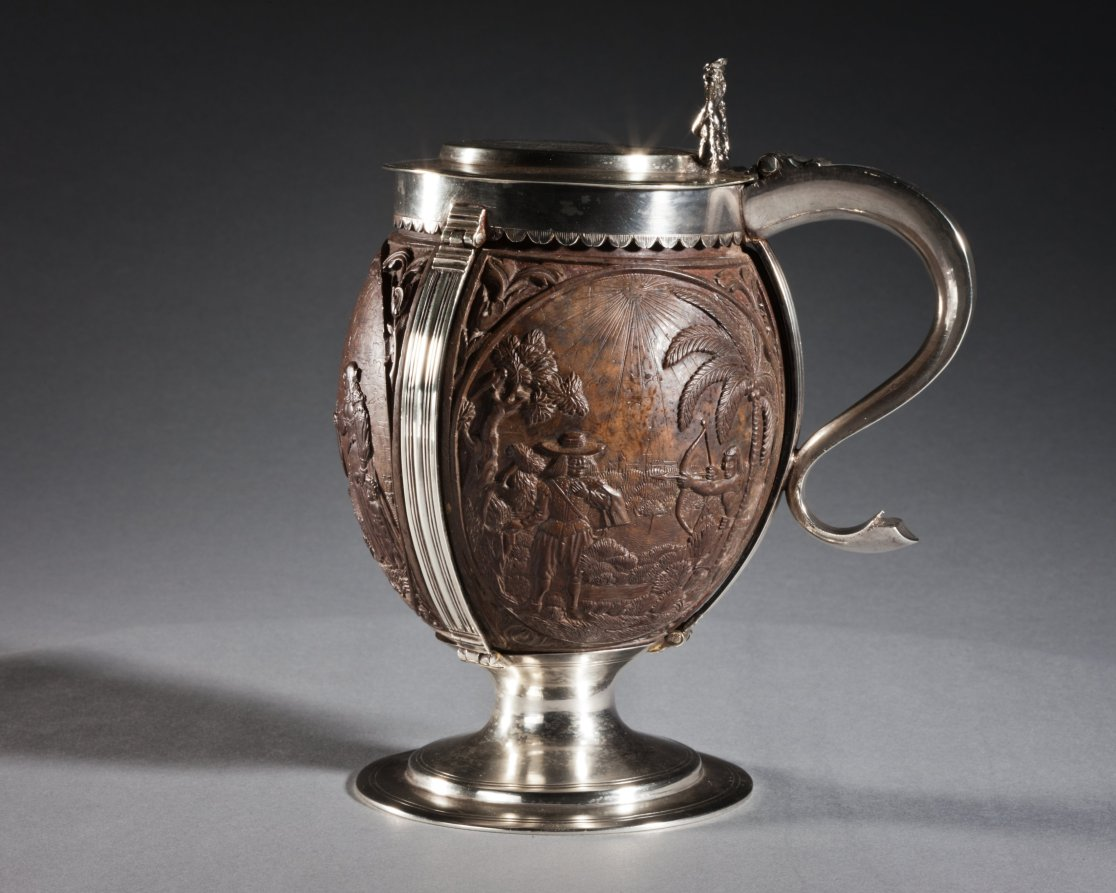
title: Coconut Cup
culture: carved coconut, probably The Netherlands; silver mount, probably England, 17th century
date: c. 1630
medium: carved coconut in silver mount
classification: Metalwork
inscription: top lid has engraved coat-of-arms, underside of lid has inscription: George Lewis TIVERTON Feby, 1st 1760.